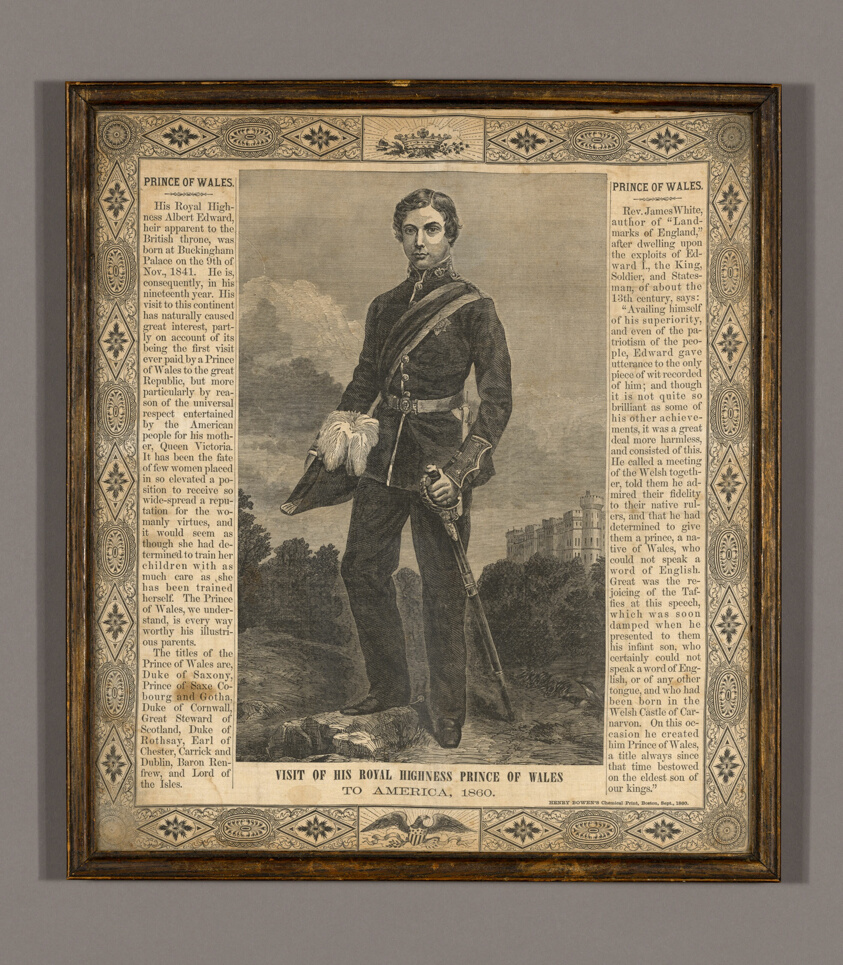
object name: Textile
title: Souvenir Handkerchief Commemorating "Visit of His Royal Highness Prince of Wales to America, 1860"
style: Arts and Crafts Movement, 19th century, American Arts and Crafts Movement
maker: United States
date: 1860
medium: Cotton, plain weave; copperplate printed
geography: United States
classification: textile; weaving - printed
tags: propaganda